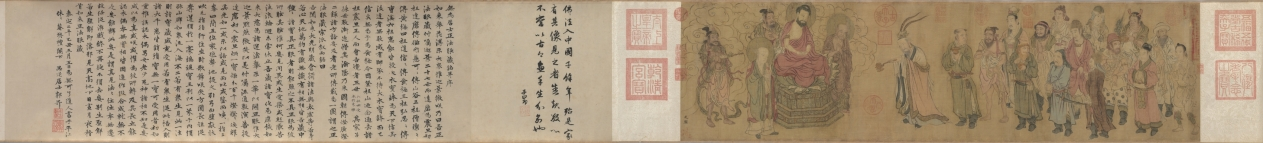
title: Barbarian Royalty Worshiping the Buddha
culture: China, Northern Song dynasty (960-1127)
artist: attributed to Zhao Guangfu (Chinese, c. 923–976)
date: 900s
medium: Handscroll; ink and color on silk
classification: Painting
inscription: 佛法入中國千餘年。殆是家有其像。見之者悉起敬心，不當以古今畫手分別也。 子昂 [印]趙氏子昂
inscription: Colophon by Guo Bi (1280–1335): A transcription of "Zheng fa yan zang ming bing xu" 正法眼藏銘幷序 by Wuwei Jushi 無為居士. Signature: Situi Jushi Guo Bi 思退居士郭畀. 2 seals.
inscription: Spurious artist's signature: Zhao Guangfu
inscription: 1 seal of the Li family (Yuan Dynasty)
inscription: 14 seals of Qianlong Emperor (r. 1736–95)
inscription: 1 seal of Jiaqing Emperor (r. 1796–1820)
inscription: 1 seal of Xuantong Emperor (r. 1909–11)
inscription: 1 official seal of the Yuan dynasty, “Tian li zhi bao 天曆之寶” (Treasure of Tianli).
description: This painting begins on the right with 15 people following a dignified figure wearing headgear with twin pheasant feathers. He extends an incense burner toward the Buddha, who is seated on his lotus throne and flanked by two haloed disciples and two Heavenly Kings. The worshipers’ diverse physical features, regional finery, and religious affiliations suggest the universal appeal of Buddhism. The imagery was inspired by the foreign envoys who frequently came to the Chinese court to give tribute to the emperor. At the time, all outsiders were considered “barbarians,” so their presence was seen as acknowledgment of China’s political and cultural power.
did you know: Sixteen "barbarians" pay homage to the Buddha, who is seated on a lotus throne with two disciples and two guardians.